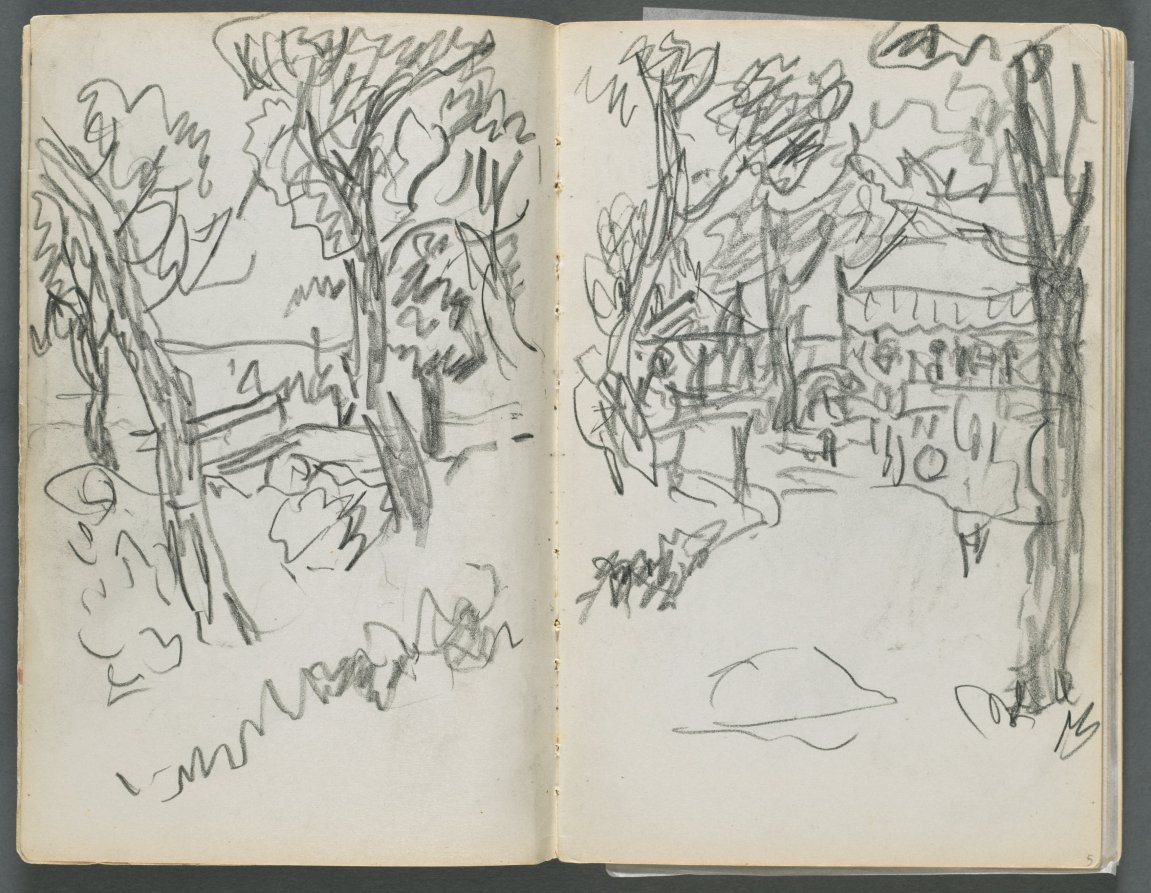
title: Sketchbook, The Dells, N° 127, page 004& 5: Landscape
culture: America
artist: Maurice Prendergast (American, born Newfoundland [now Canada], 1858–1924)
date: c. 1919–1921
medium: graphite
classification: Bound Volume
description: This sketchbook contains 59 pages of graphite drawings and 16 watercolors made at various locations on Cape Ann, Massachusetts.